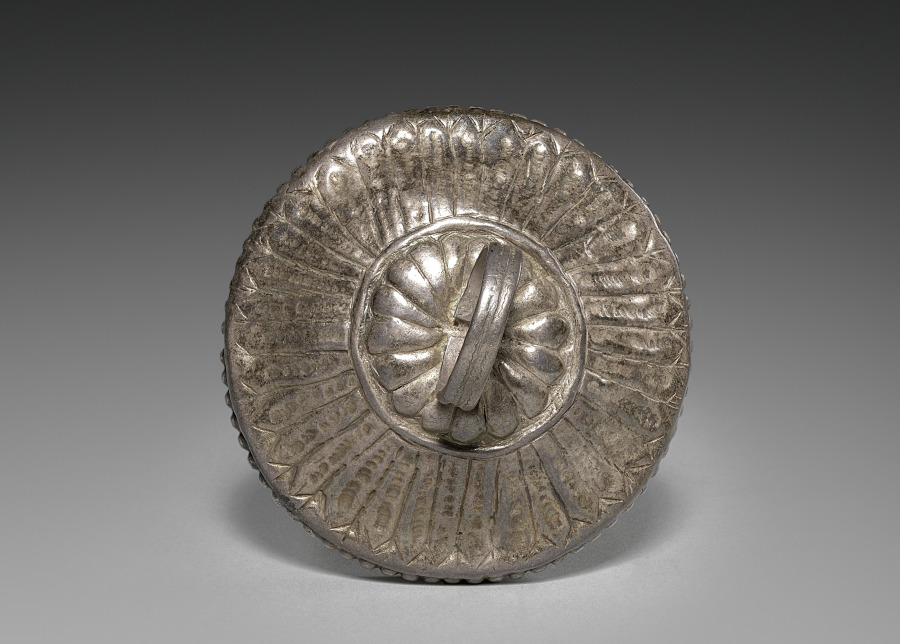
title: Thumb Ring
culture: India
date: 1800s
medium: silver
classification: Jewelry